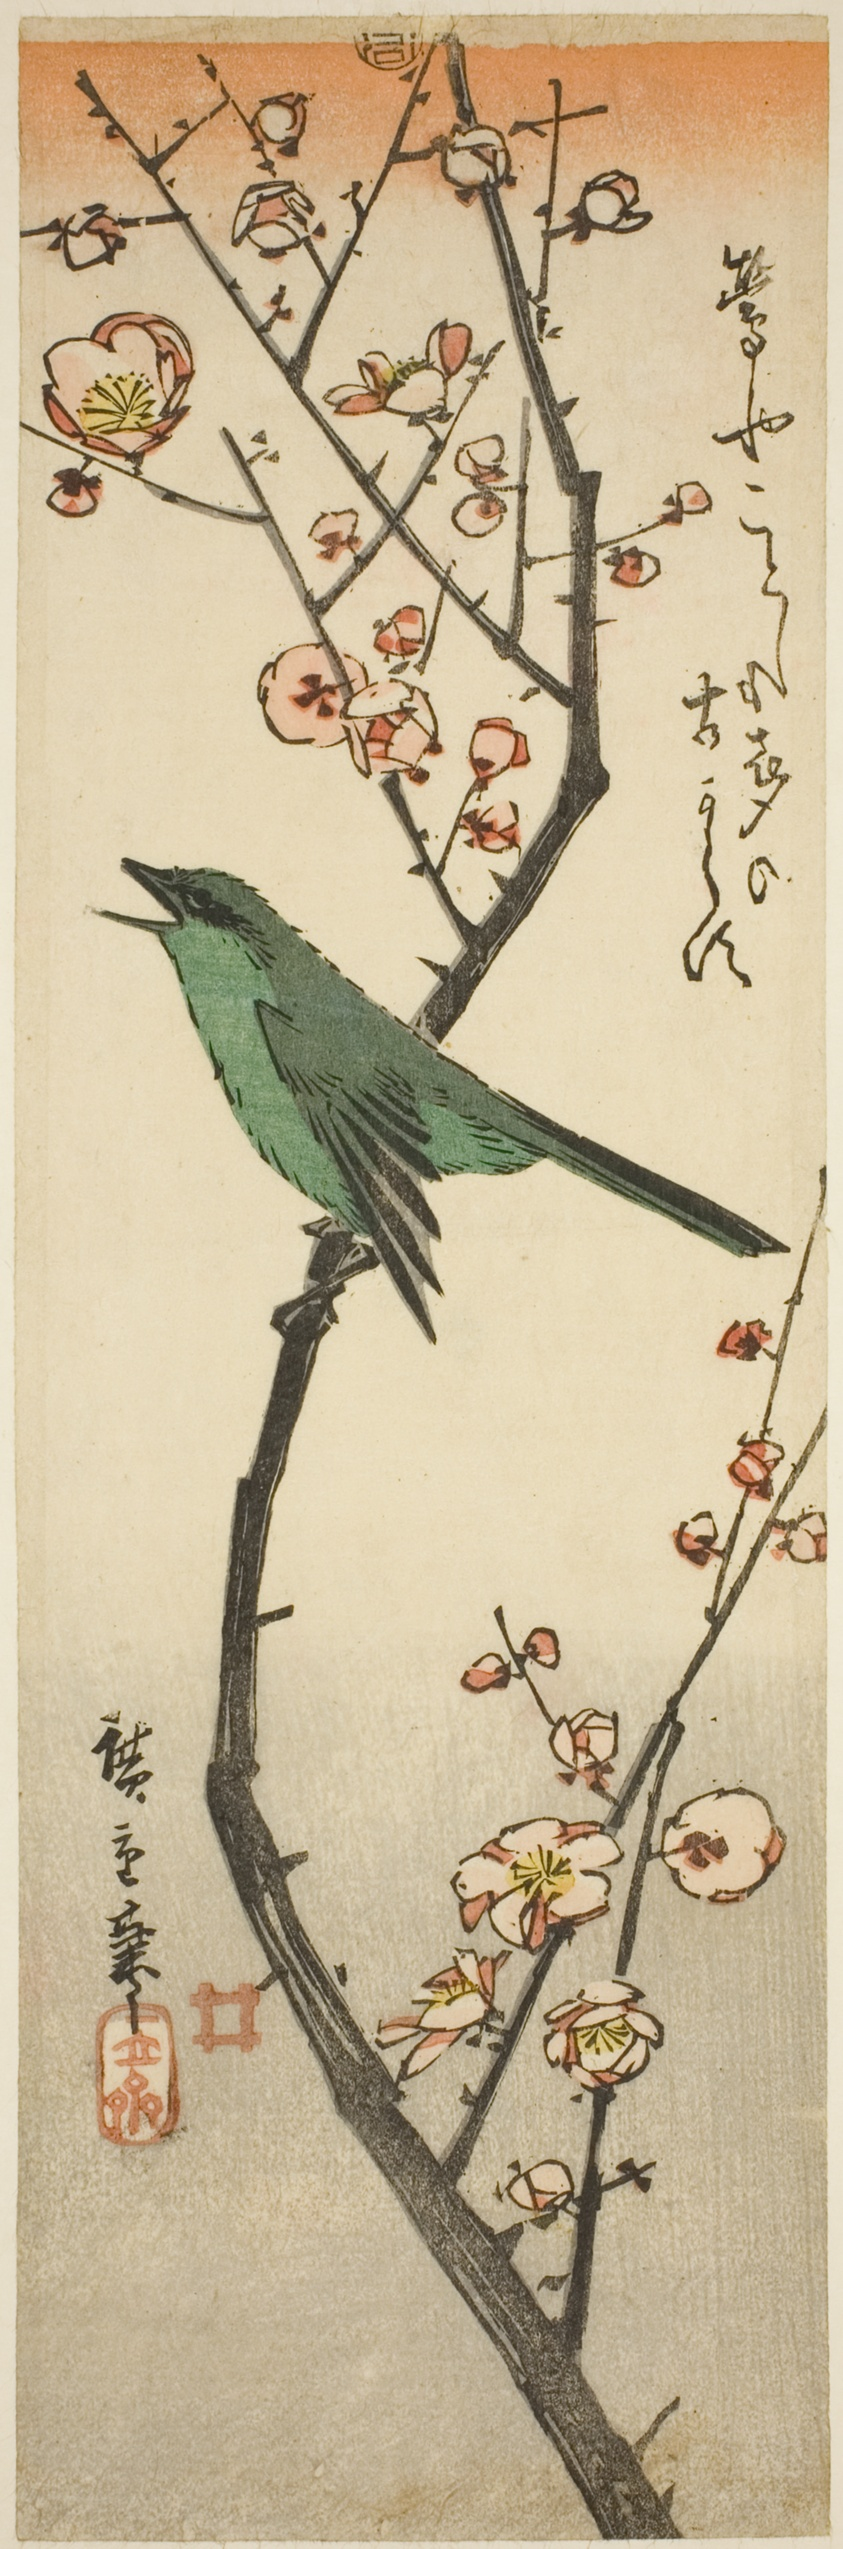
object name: Print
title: Bush warbler and plum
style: Japanese (culture or style)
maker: Utagawa Hiroshige 歌川 広重; Japanese, 1797-1858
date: 1840s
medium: Color woodblock print; kotanzaku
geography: Japan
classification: woodblock print; print; asian art